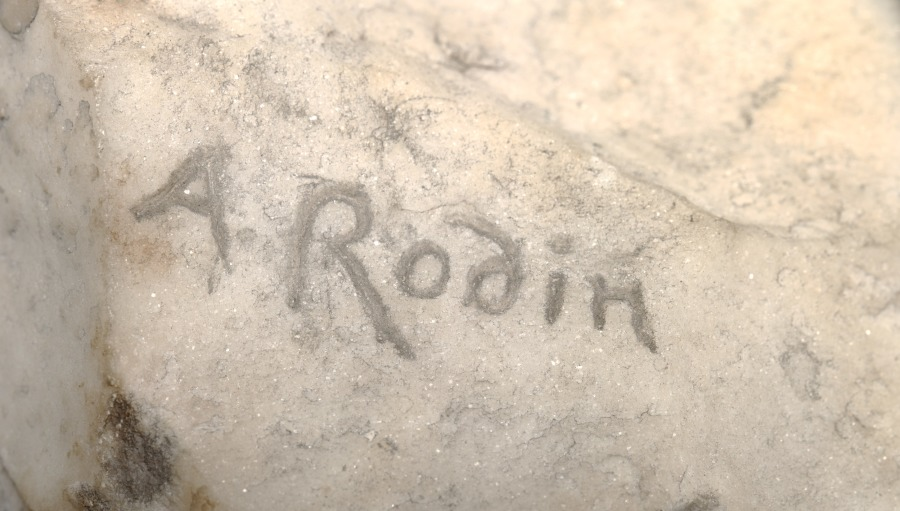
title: Father Pierre-Julien Eymard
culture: France, 19th century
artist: Auguste Rodin (French, 1840–1917)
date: ca. 1863 (original model)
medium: bronze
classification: Sculpture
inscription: Signed on left side of collar: "Rodin"; on base, back right: "A. Rodin"